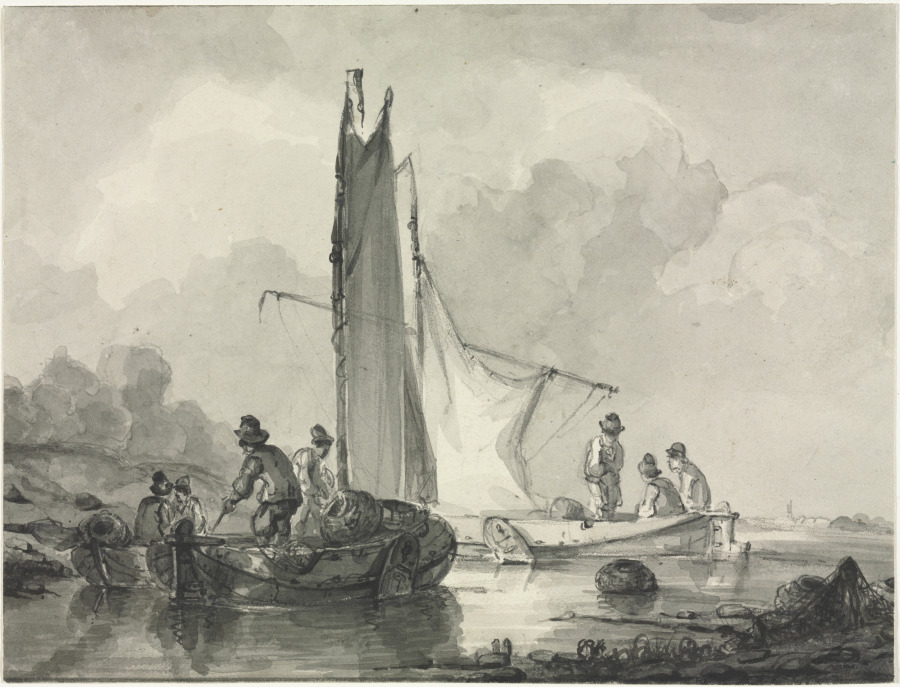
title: River Landscape with Fisherman and Three Boats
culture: Dutch, 19th century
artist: Albertus van Beest (Dutch, 1820–1860)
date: second third 19th century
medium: brush and black and gray ink and brush and gray wash and graphite, with traces of point of brush and grey wash and pen and black ink; framing lines in graphite (top and bottom)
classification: Drawing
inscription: signed, lower right, in graphite: Av.B. ; VERSO, lower right, in graphite: A. van Beest / Holland / school -- born 1820 --